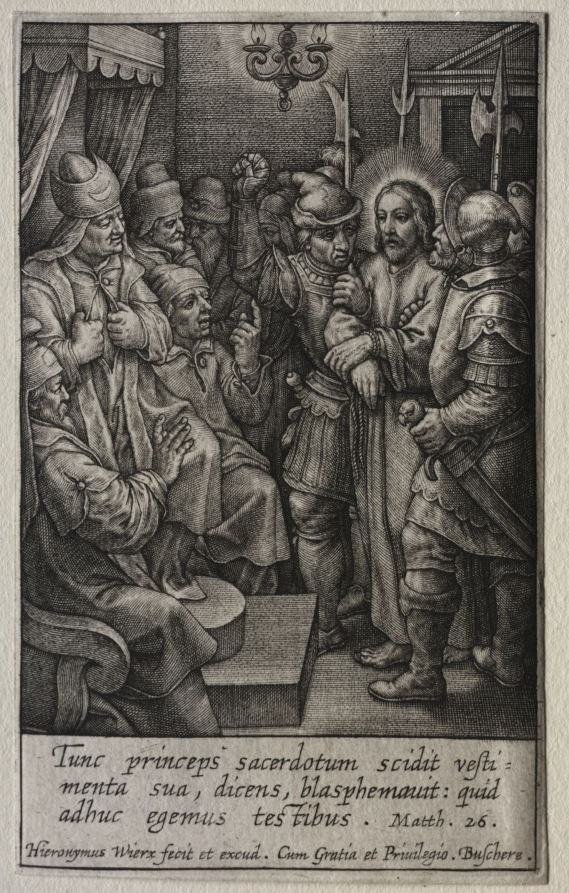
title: The Passion: Christ before Caiaphas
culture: Flanders, late 16th-early 17th century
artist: Hieronymus Wierix (Flemish, 1553–1619)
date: before 1619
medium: engraving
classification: Print